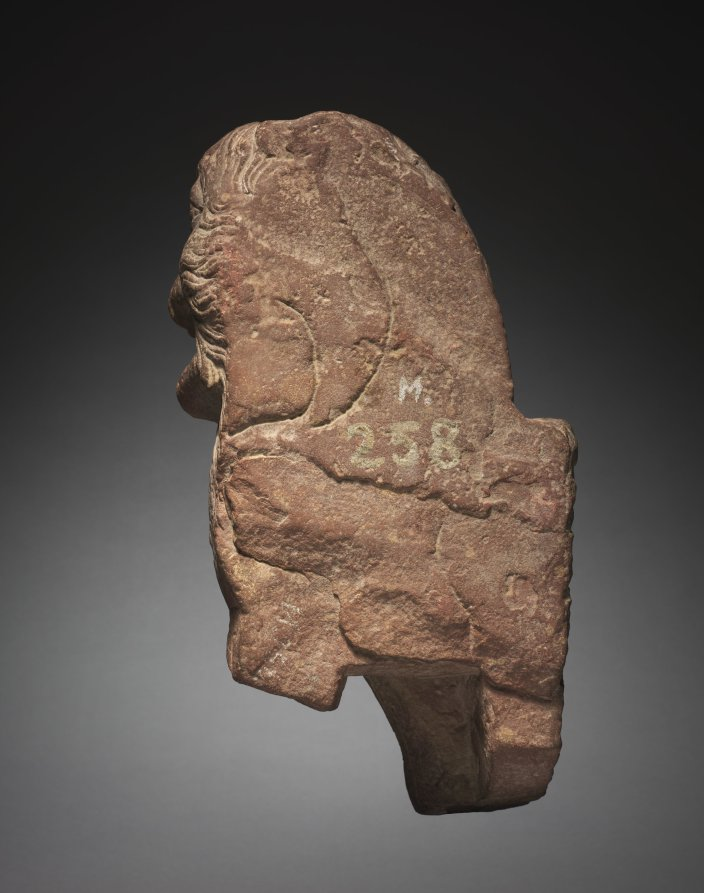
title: Lion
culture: Northern India, Uttar Pradesh, Mathura, Kushan period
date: 100s–200s CE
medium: sandstone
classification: Sculpture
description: Roaring lions such as this have been found on the throne of Kushan kings. Early sculptures of the Buddha also show him seated on a lion throne, and the roar of his teachings (dharma) extends throughout the world.